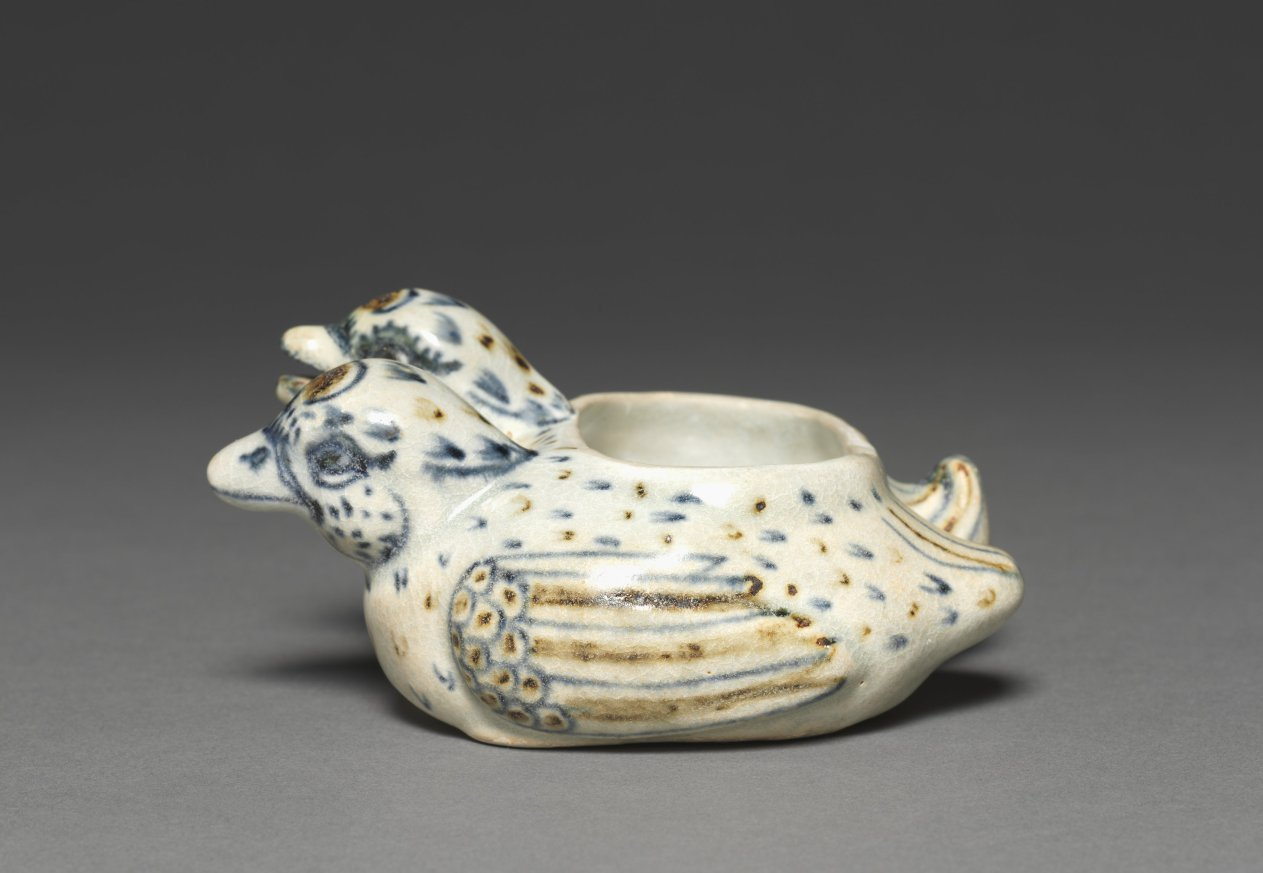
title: Double Ducks Jar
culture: Vietnam (Annam)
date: 1400s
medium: porcelain with underglaze blue and iron spots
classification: Ceramic